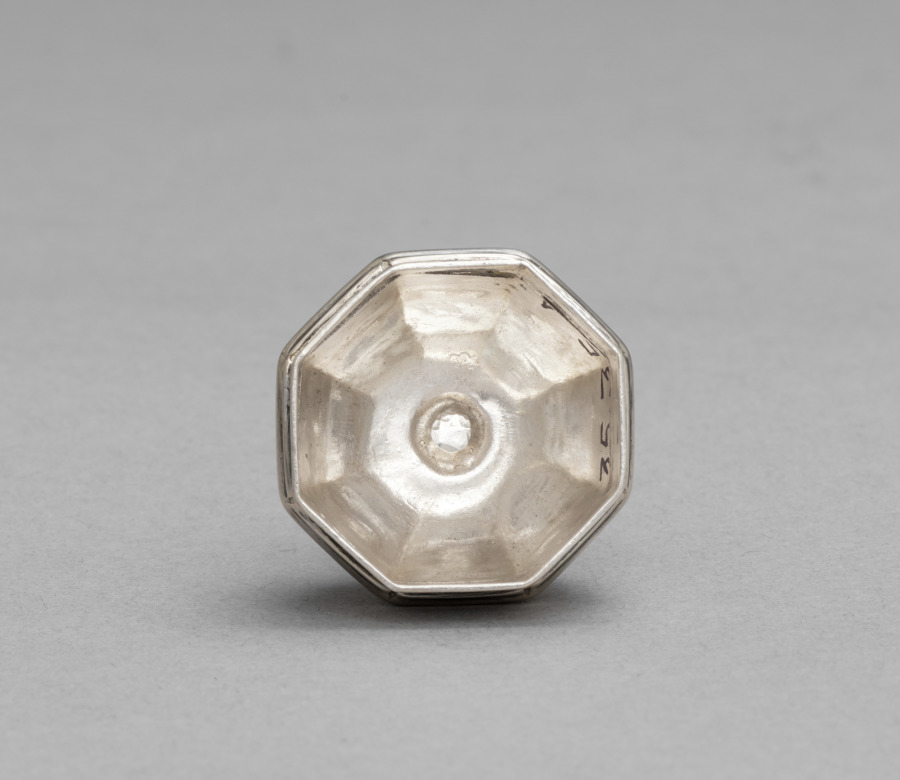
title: Cover for a Tea Caddy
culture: England, London, 18th century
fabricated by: Thomas Ash (British)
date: 1713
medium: silver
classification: Silver